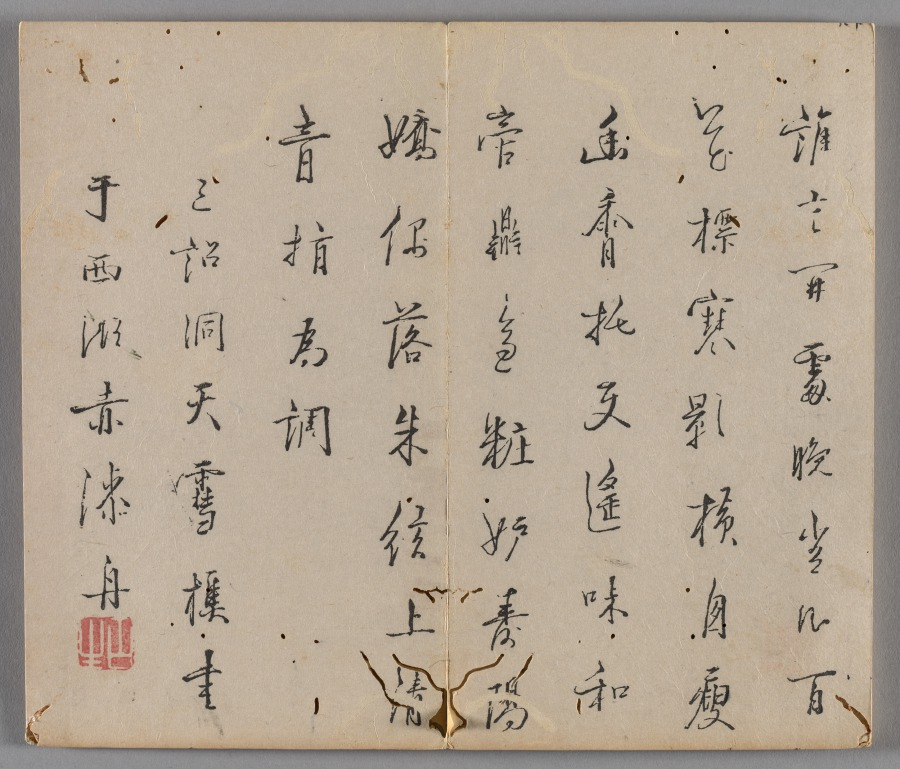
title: Ten Bamboo Studio Painting and Calligraphy Handbook (Shizhuzhai shuhua pu): Plum Blossoms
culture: China, Qing dynasty (1644-1911)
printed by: Hu Zhengyan (Chinese, c. 1584–1674)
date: 1633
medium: Woodblock-printed book; ink and colors on paper; first edition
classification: Print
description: Color printing reached a level of perfection in the early 1600s, as seen in this Ten Bamboo Studio Collection of Calligraphy and Painting and the Mustard Seed Garden Manual of Painting (printed 1679 and 1701). The painterly quality, precision in registering (aligning) the woodblocks, and harmonious colors made them the most successful color print editions in Chinese history. Both editions were printed and compiled in Nanjing, spread nationwide, and had a great impact on the arts in Japan and Korea.